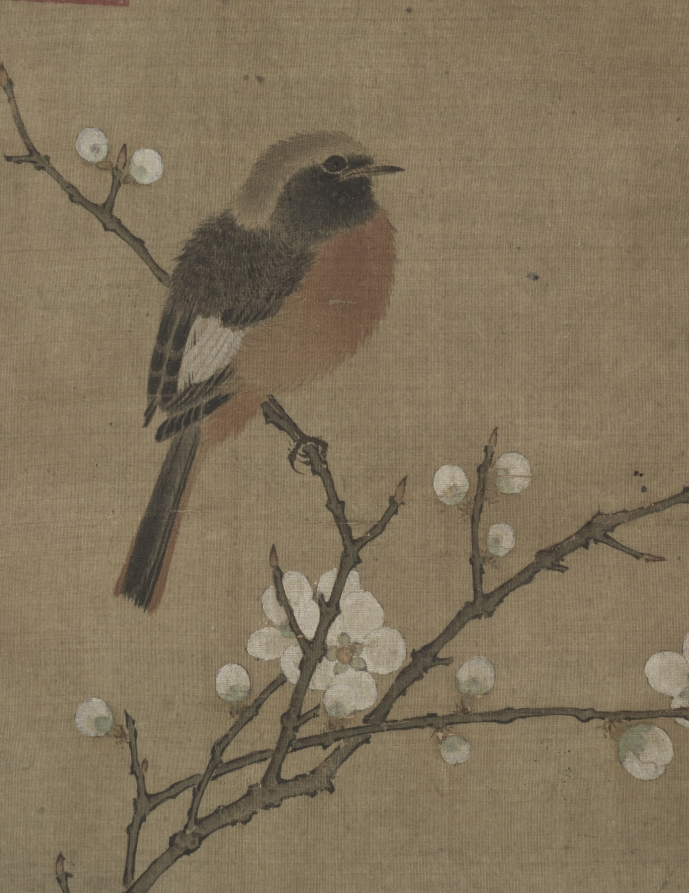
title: Bird on a Flowering Branch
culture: China, Southern Song dynasty (1127–1279)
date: 1100s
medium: album leaf mounted as a hanging scroll; ink and color on silk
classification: Painting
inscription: 2 seals: 1 official seal of the Yuan Dynasty; 1 unidentified partial seal.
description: A male redstart sits hunched on the branch of a flowering plum tree in early spring. The bird’s plumage is rendered in fine detail with a great naturalistic sense, characteristic of Southern Song court painting. While redstarts tend to spend the winter in warmer climates, they may have been seen during the mild winters in China’s southeast in Hangzhou, the seat of the former imperial painting academy where this album leaf was presumably produced. The small square painting must have once been part of an album. When collected in Japan, it was mounted as a hanging scroll, presumably to fit it in an alcove to be enjoyed during the tea ceremony.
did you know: The seal at the upper left is an official Yuan dynasty seal used on paintings and calligraphy in the imperial collection.